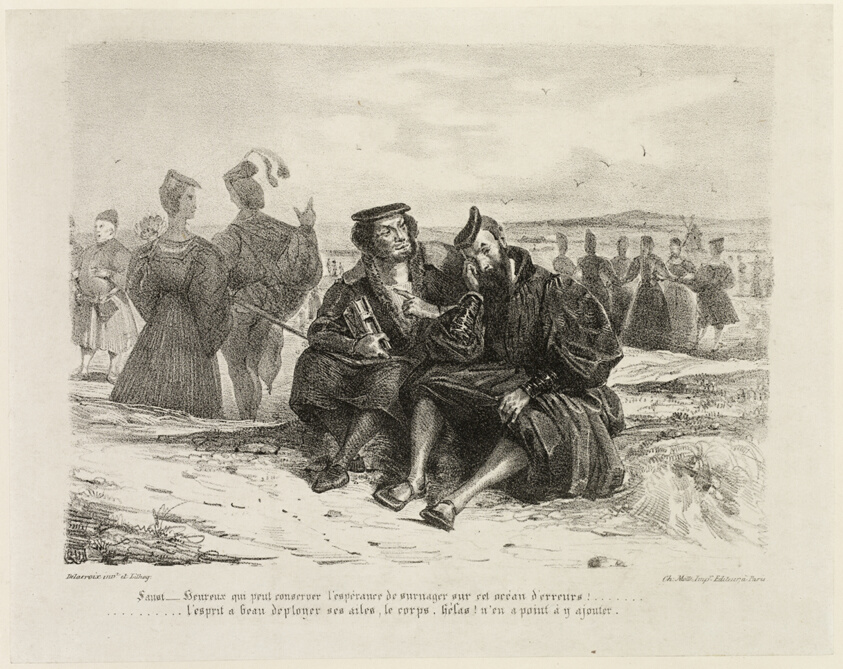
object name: Print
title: Faust and Wagner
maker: Eugène Delacroix (French, 1798-1863)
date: 1828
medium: Lithograph in black on light gray China paper laid down on ivory wove paper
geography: France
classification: lithograph; print; prints and drawing